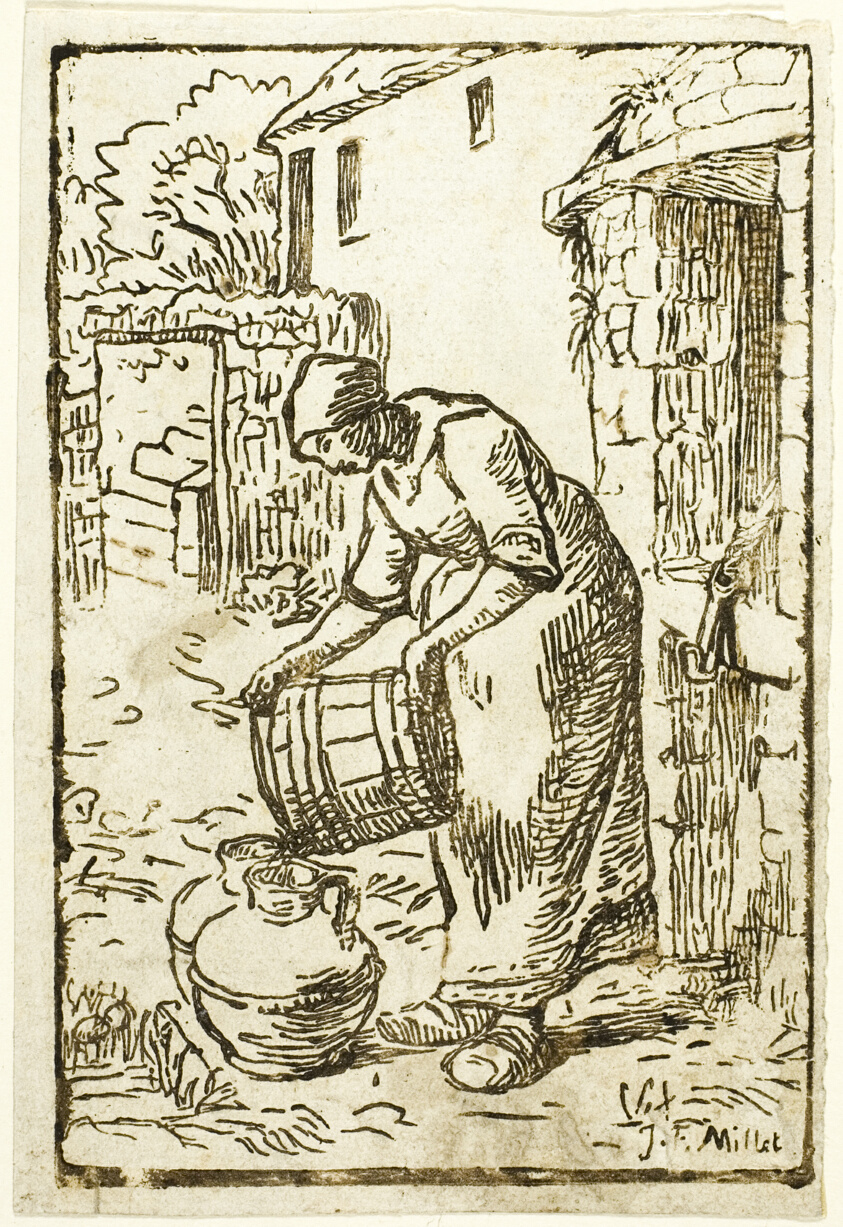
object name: Print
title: Woman Filling Water-Cans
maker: Pierre Millet (French, 1833-1914); after Jean François Millet (French, 1814-1875)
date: 1854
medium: Woodcut in dark brown on ivory laid China paper, with an etching of a landscape, verso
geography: France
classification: woodcut; print; prints and drawing